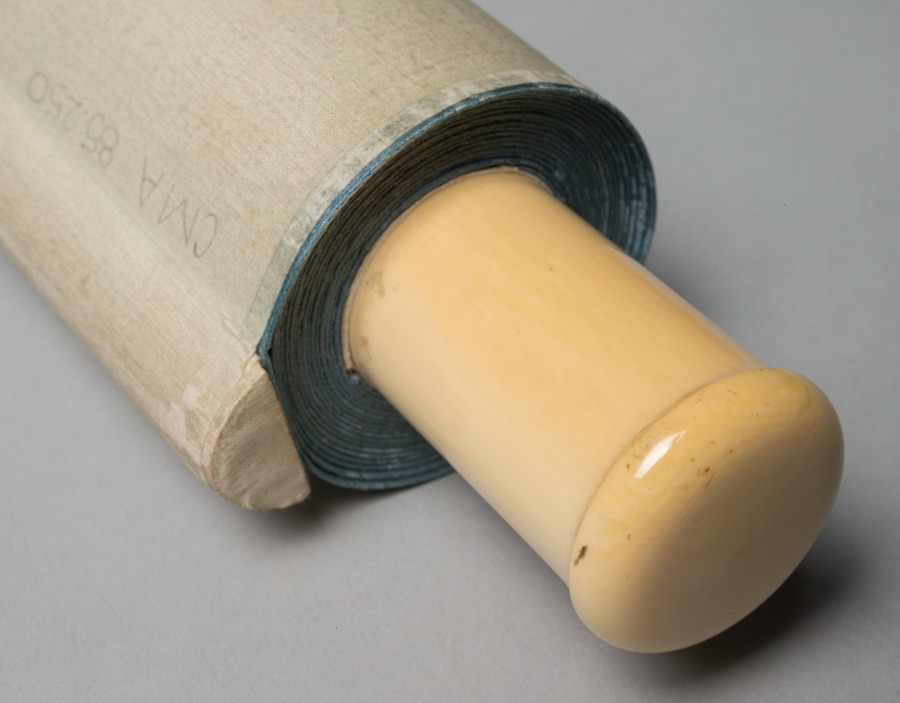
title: Mountain View and Blue Water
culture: Japan, Edo period (1615–1868)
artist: Tanomura Chikuden (Japanese, 1777–1835)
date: early 1800s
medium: hanging scroll; ink, color, and gold on paper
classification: Painting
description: Tanomura Chikuden was an eminent painter whose adopted son, Tanomura Chokunyū (1814–1907), was Seifū Yohei III’s painting teacher. This work was displayed at a gathering commemorating the 10th anniversary of Chokunyū’s death, something we know only because its custom-made box and archival documents have been carefully kept together. The box inscription also confirms that Chikuden was emulating the style of the Mi family of painters, active during China’s Southern Song dynasty (1127–1279). The painting’s Chinese-style silk wrapper is inscribed and sealed on its interior by members of Chokunyū’s community.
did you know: The mountain shapes are built up with multiple small wet strokes.